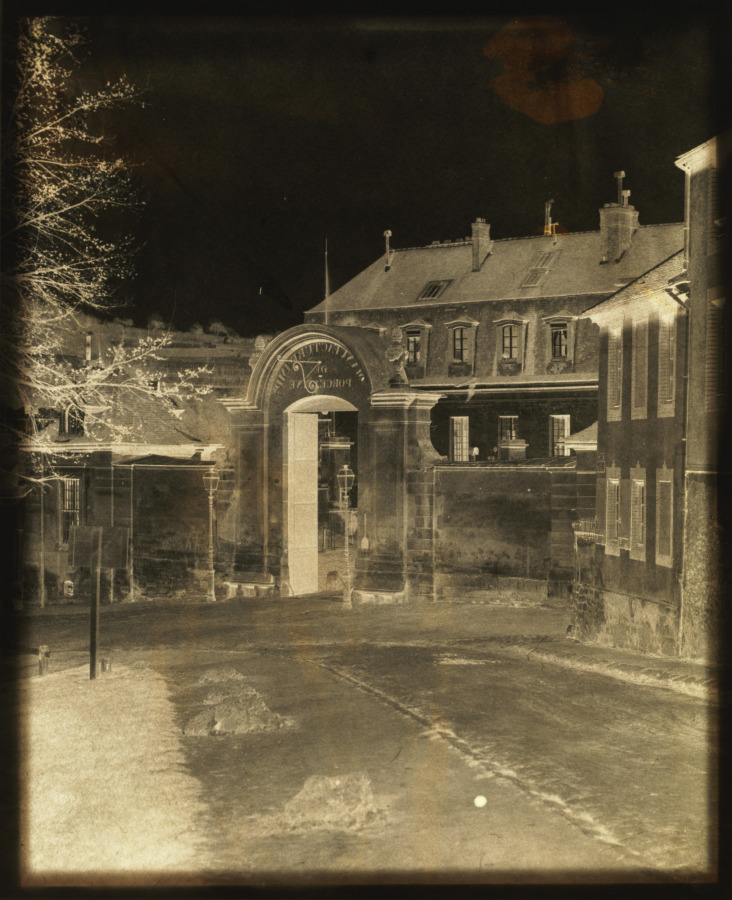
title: Doorway to Sèvres Factory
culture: France, Sèvres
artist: Louis-Rémy Robert (French, 1811–1882)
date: c. 1852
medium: waxed paper negative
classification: Photograph